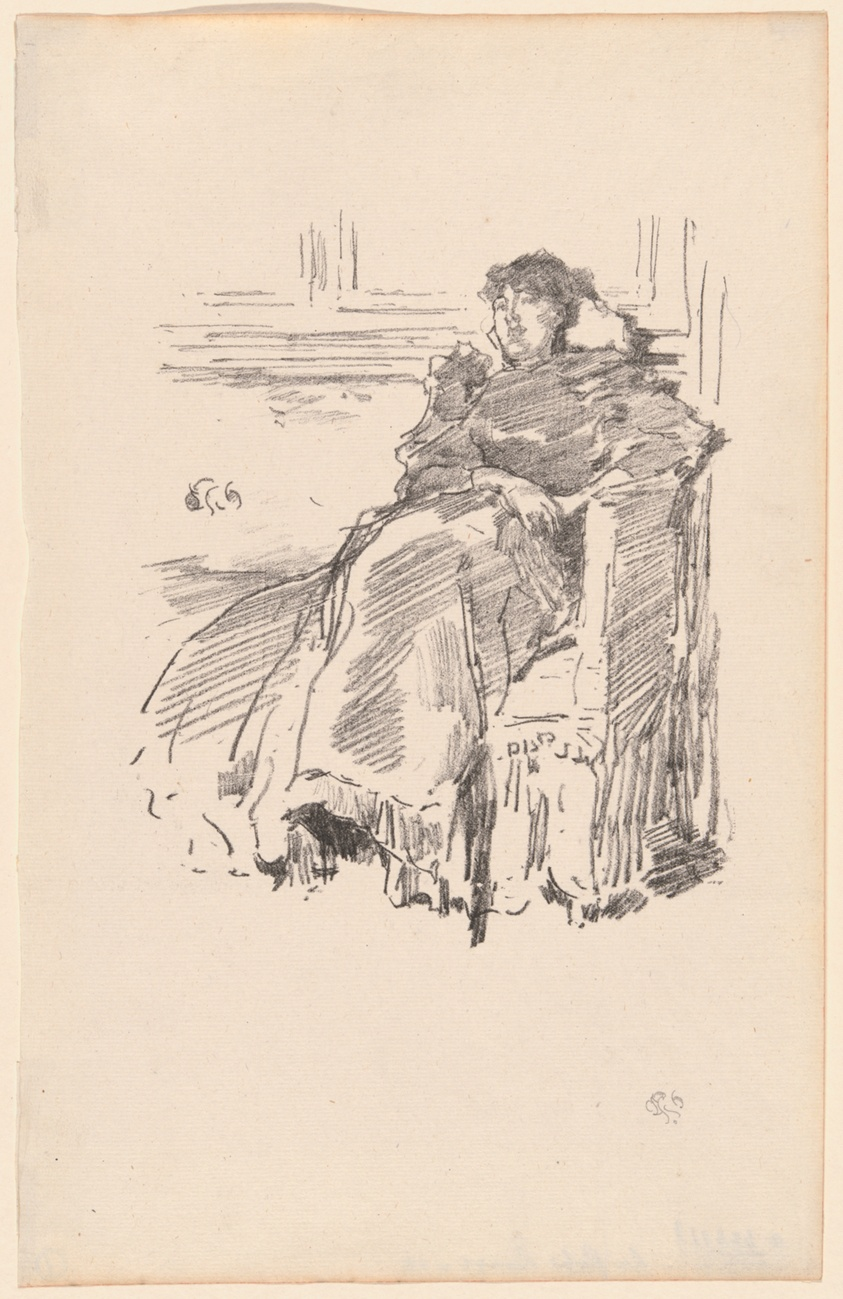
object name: Print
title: La Robe Rouge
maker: James McNeill Whistler (American, 1834-1903)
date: 1894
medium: Transfer lithograph in black on ivory laid paper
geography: United States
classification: transfer lithograph; lithograph; print; prints and drawing; paper